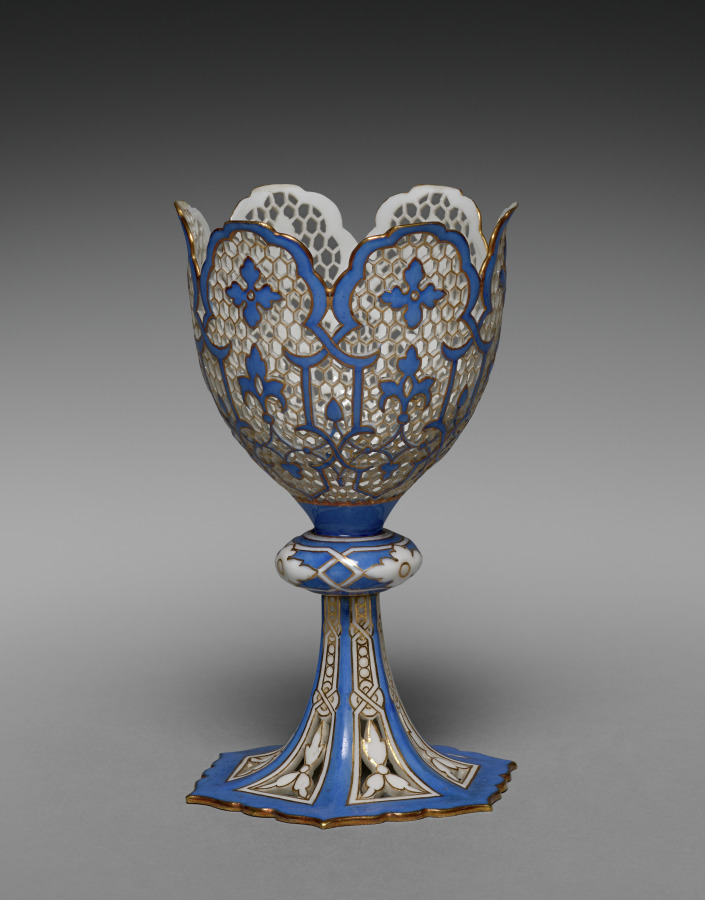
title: Cupholder (Zarf)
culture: France, Sèvres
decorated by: Guyonnet (French)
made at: Sèvres Porcelain Factory (French, est. 1756)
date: c. 1848–55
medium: hard-paste porcelain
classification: Ceramic